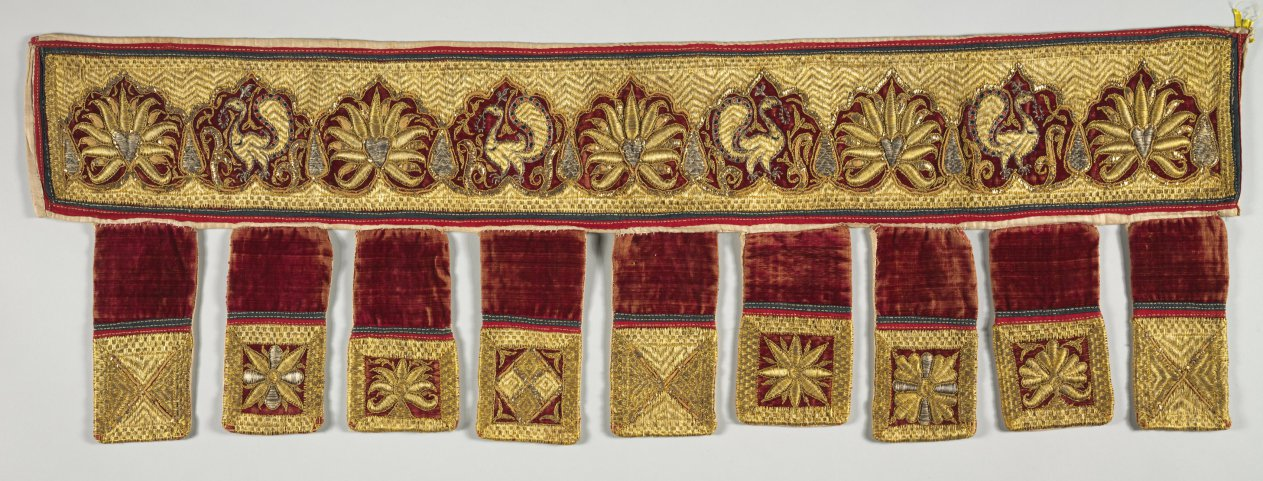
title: Embroidered Door Hanging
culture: India, 18th century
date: 1700s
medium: velvet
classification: Embroidery